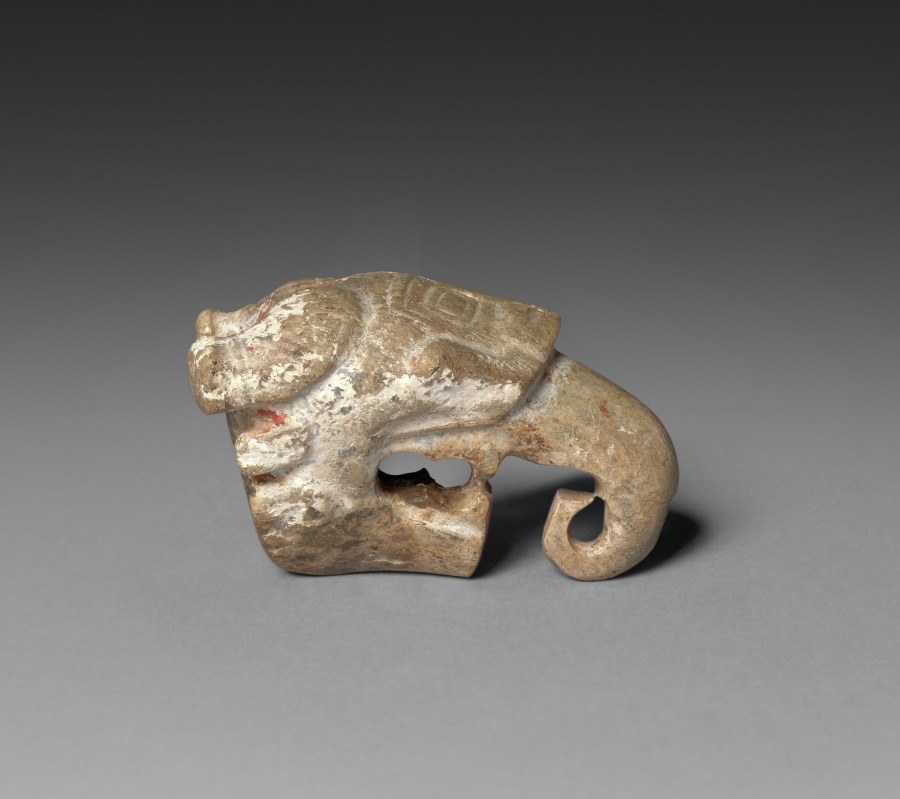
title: Feline Head with Bovine Horns and Elephant Trunk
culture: China, Shang dynasty (c. 1600–c. 1046 BCE)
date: 1300–1000 BCE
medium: jade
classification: Jade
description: This small jade was shaped into a fantastic, composite animal: a feline form with bovine horns and an elephant's trunk.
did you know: The mouth, the underside of the nose, and the tapering hole for attachment at the rear of the head were cut by drilling.